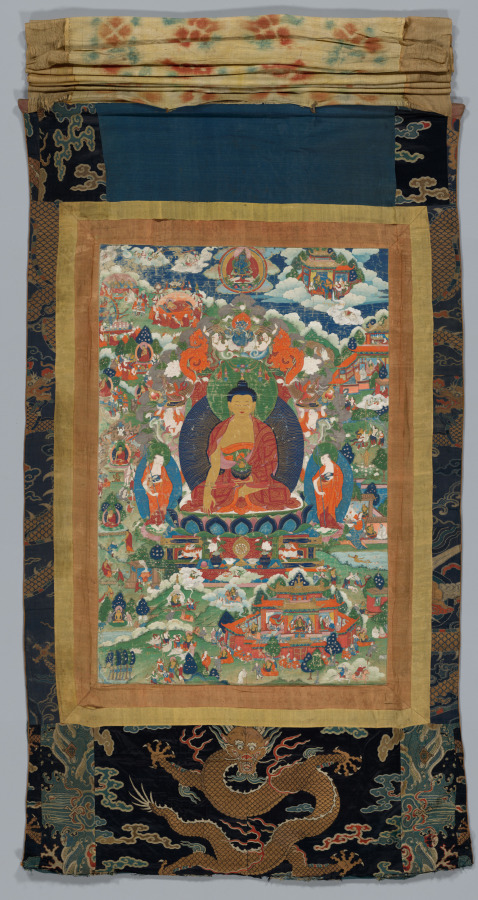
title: Shakyamuni Buddha with scenes from his life story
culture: Tibet, Qing dynasty (1644–1911)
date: c. 1700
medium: gum tempera on cloth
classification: Painting